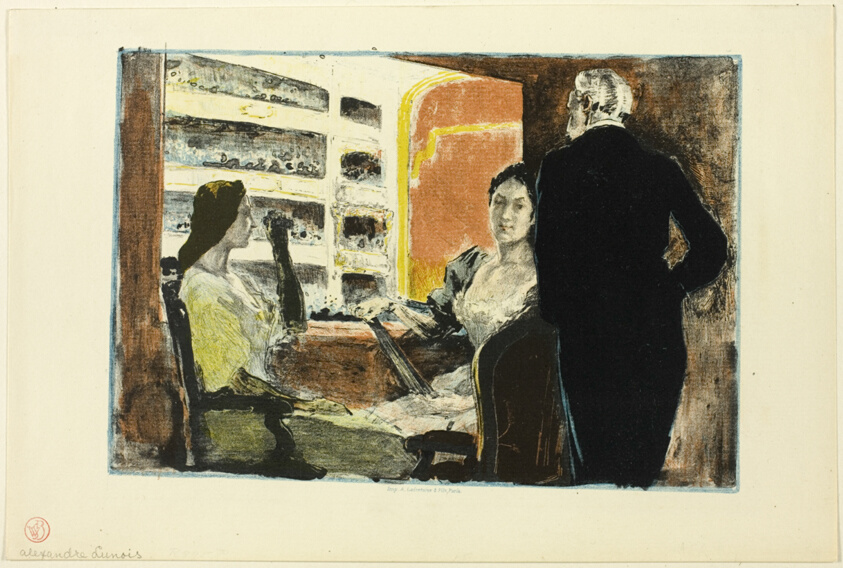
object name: Print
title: During Intermission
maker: Alexandre Lunois (French, 1863-1916)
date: published 1894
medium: Lithograph (crayon, brush, scraping, tusche) in black, orange, yellow and blue on cream laid paper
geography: France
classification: lithograph; print; prints and drawing